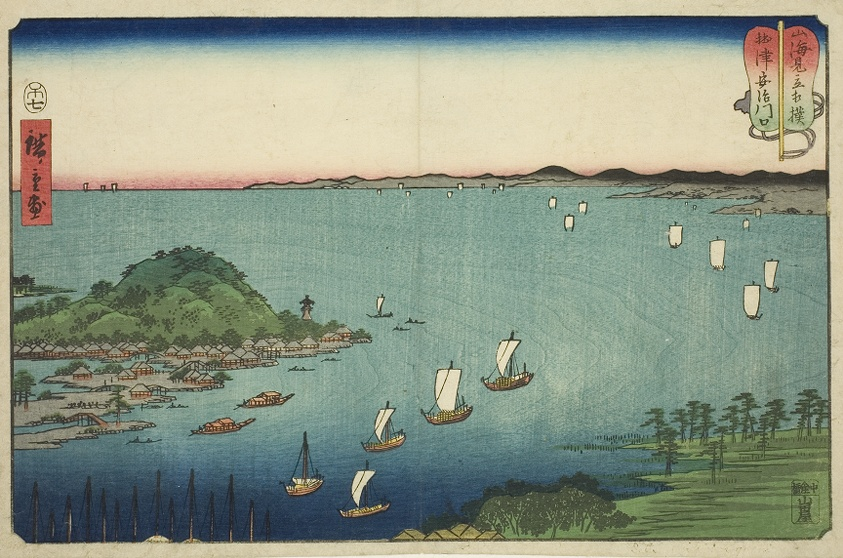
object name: Print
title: The Mouth of the Aji River in Settsu Province (Settsu Ajikawaguchi), from the series "Wrestling Matches between Mountains and Seas (Sankai mitate zumo)"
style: Japanese (culture or style)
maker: Utagawa Hiroshige 歌川 広重; Japanese, 1797-1858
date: 1858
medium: Color woodblock print; oban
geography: Japan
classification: woodblock print; print; asian art